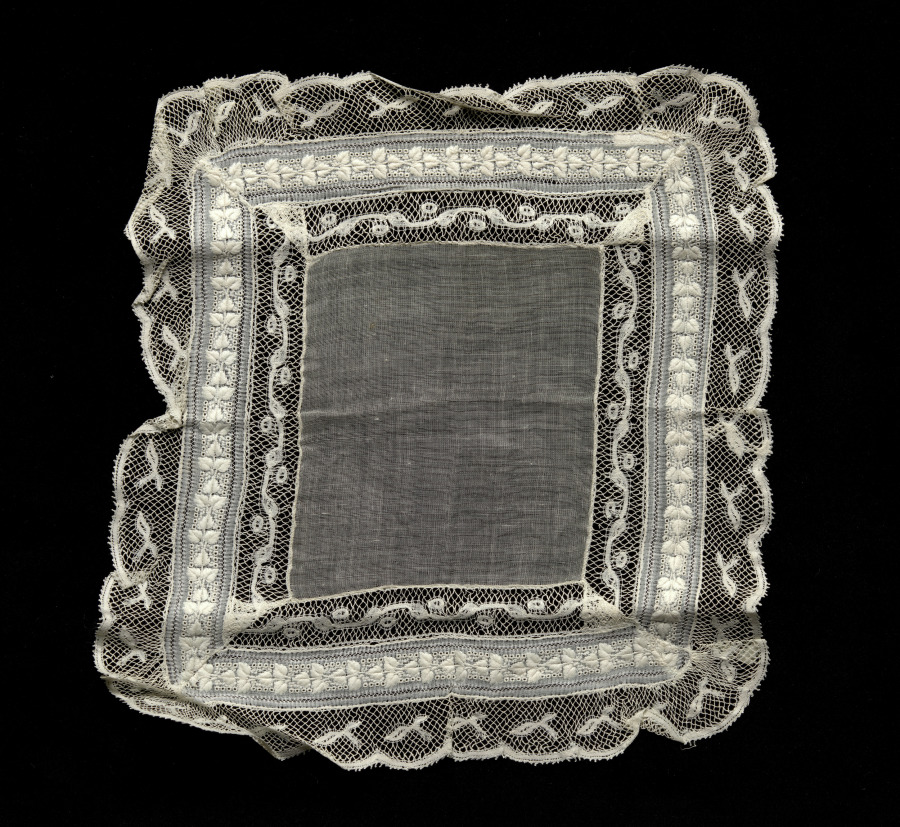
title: Lace Handkerchief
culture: France or Flanders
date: 1880–99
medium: Plain weave linen center: bobbin lace (Valenciennes) border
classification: Lace